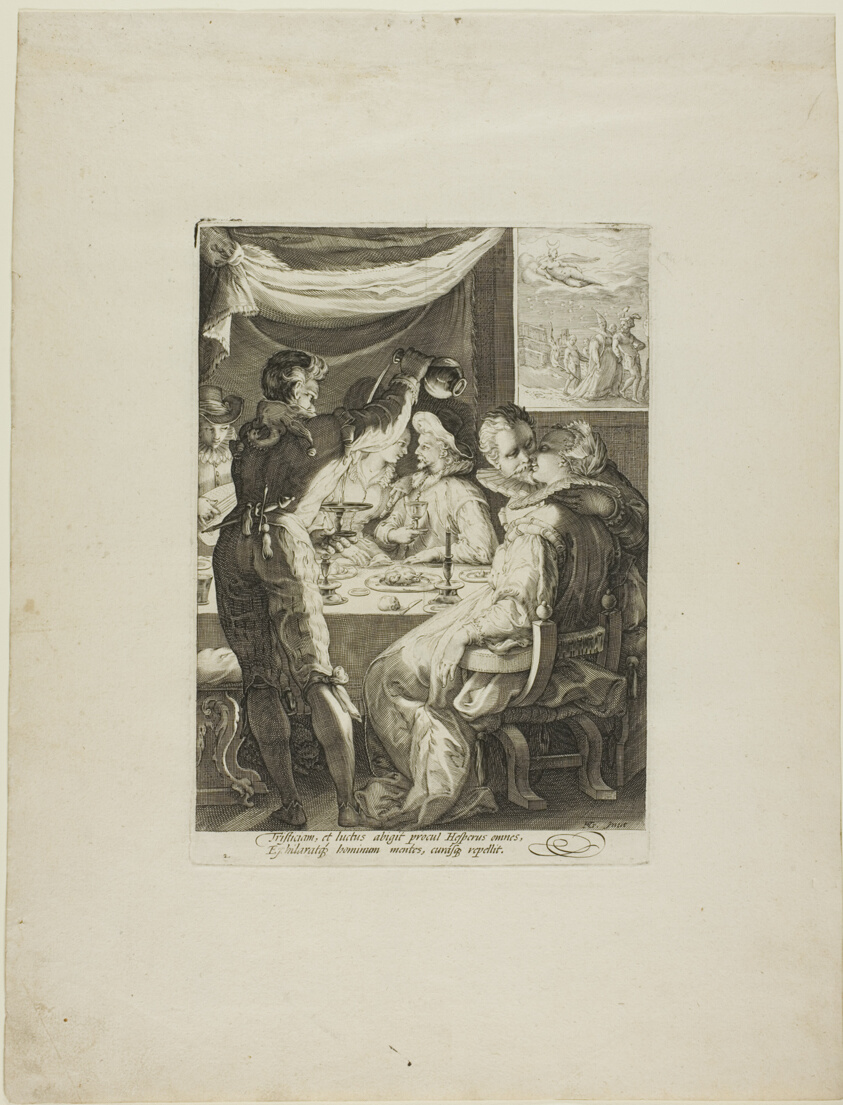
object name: Print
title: Evening, plate two from Four Times of Day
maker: Jan Saenredam (Dutch, 1565-1607); after Hendrik Goltzius (Dutch, 1558-1617)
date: c. 1595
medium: Engraving on cream laid paper (discolored to beige)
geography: Netherlands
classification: engraving; paper; print; prints and drawing